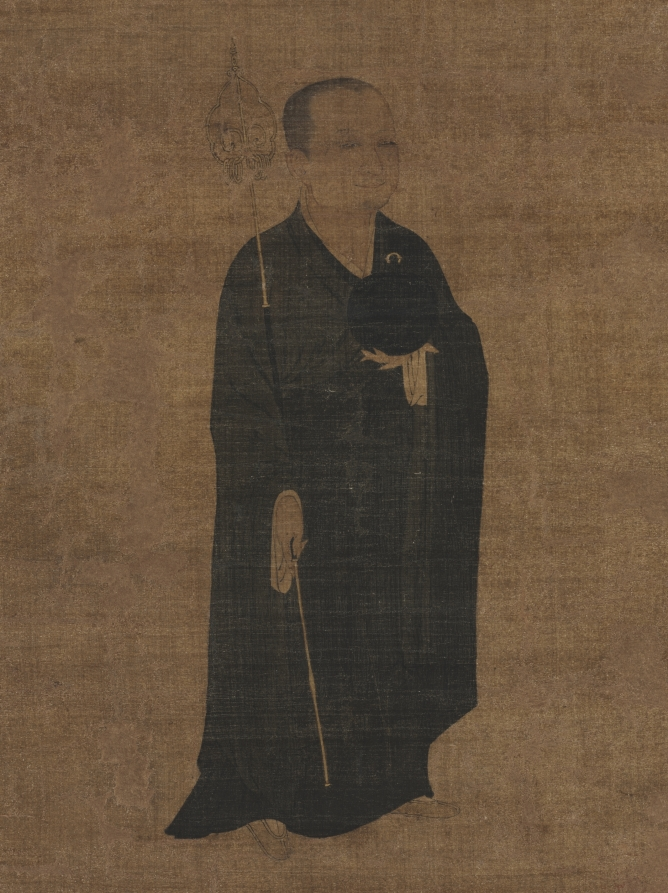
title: Portrait of Priest Dazhi (1048–1116), Master of Law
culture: China, Southern Song dynasty (1127-1279)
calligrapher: Liu Tao (Chinese, late 1000s–early 1100s)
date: 1100s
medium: Hanging scroll; ink and light color on silk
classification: Painting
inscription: Inscription by Liu Tao (late 1000s–early 1100s): Dignified with the perfection of the upasampada,/ His appearance is like his mind;/ Uncompromising and loftily aloof,/ His mind is like his appearance./ To say he is square, he proves to be round;/ He looks timid, yet his spirit is unbound./ Having no attachment, and holding no reins,/ Man and deities alike take refuge in him. (Translation by WKH, 1980)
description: Monk Yuanzhao, with the honorific title Dazhi Lüshi, Great Wisdom Master of Vinaya, is depicted here as an itinerant monk, holding his alms bowl in the left and staff in the right. In 1142, Emperor Gaozong had bestowed Yuanzhao with a posthumous title, mentioned in the inscription, which suggests that the portrait was made after the master’s death. A master of the Lü sect of Buddhism, with a calm benevolent smile on his face, Yuanzhao was active on Mount Tiantai and in Hangzhou. Later, Liu Tao, a southerner from Changxing, added the inscription. The eulogy reads: Dignified he is, perfect in his upasampada [ordination of a monk]. His appearance is like his mind. Uncompromising and aloof. His mind is like his appearance. To say he is square, he proves to be round. He looks timid, yet his spirit is unbound. Having no attachment, and holding no reins, men and deities alike take refuge in him. —translated by Wai-Kam Ho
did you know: A native of Hangzhou, the priest Dazhi was known for his eloquent exposition of Buddhist doctrines and for his success in winning many converts.